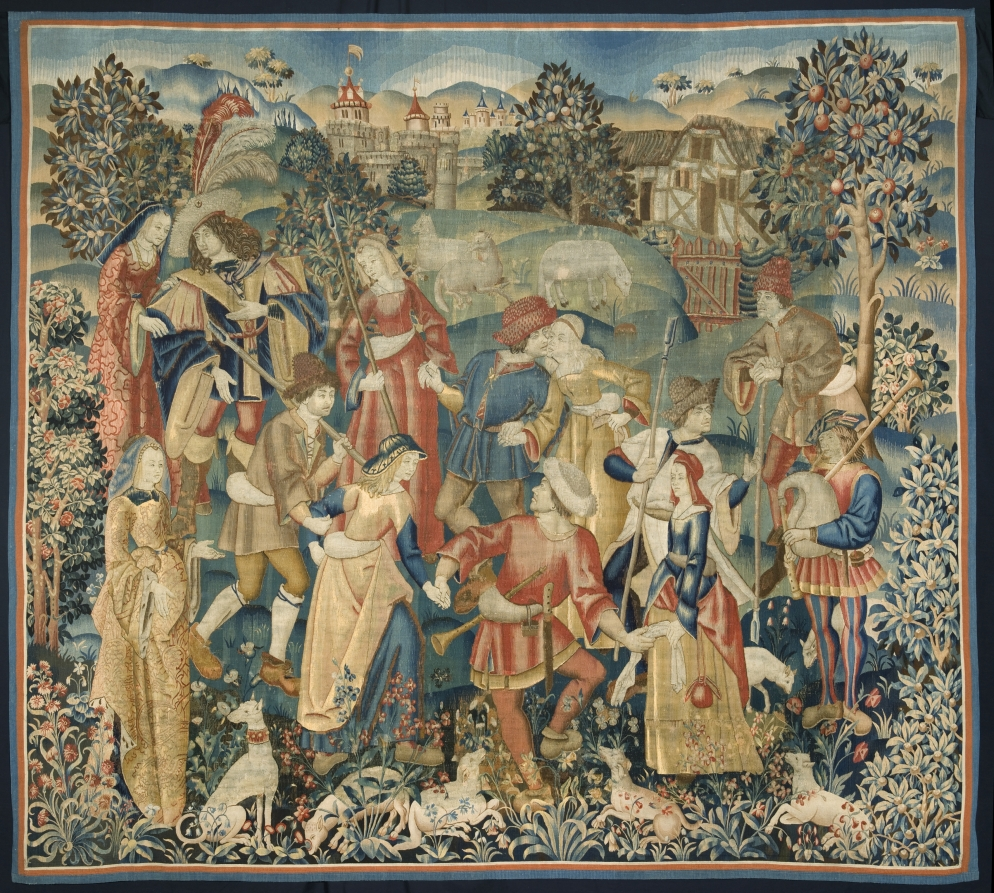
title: Shepherds in a Round Dance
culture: Netherlands, early 16th century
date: around 1500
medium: Wool and silk: tapestry weave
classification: Tapestry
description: Late medieval tapestries often use a limited yet contrasting color palette to portray stylized images. The expressions of these figures, for example, are conveyed more by their postures than by their faces. Four shepherds and shepherdesses join hands and dance to the music of a bagpiper at the far right, while a lord and two ladies on the left look on. A dog and sheep amid blossoming plants and trees contribute to the festive pastoral scene in front of a castle.